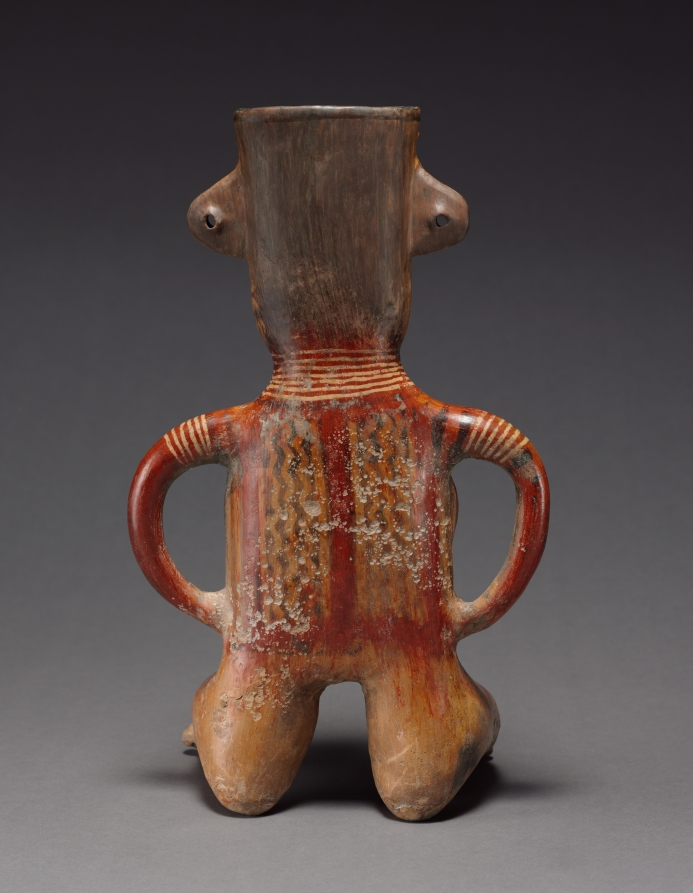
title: Seated Female Figure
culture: Mexico, Jalisco, Zacatecas style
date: 100 BCE–300 CE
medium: pottery with burnished, colored slips, resist patterning, and possibly post-fire painting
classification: Sculpture